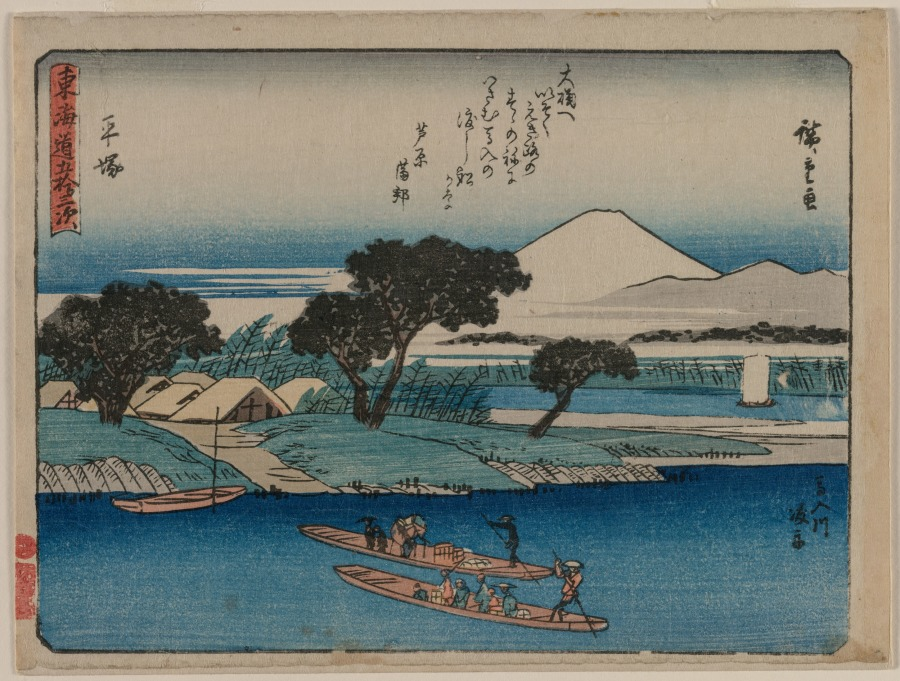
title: The Fifty-Three Stations of the Tokaido: Hiratsuka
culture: Japan, Edo period (1615–1868)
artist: Utagawa Hiroshige (Japanese, 1797–1858)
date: c. 1840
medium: color woodblock print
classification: Print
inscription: Publisher: Sanoki